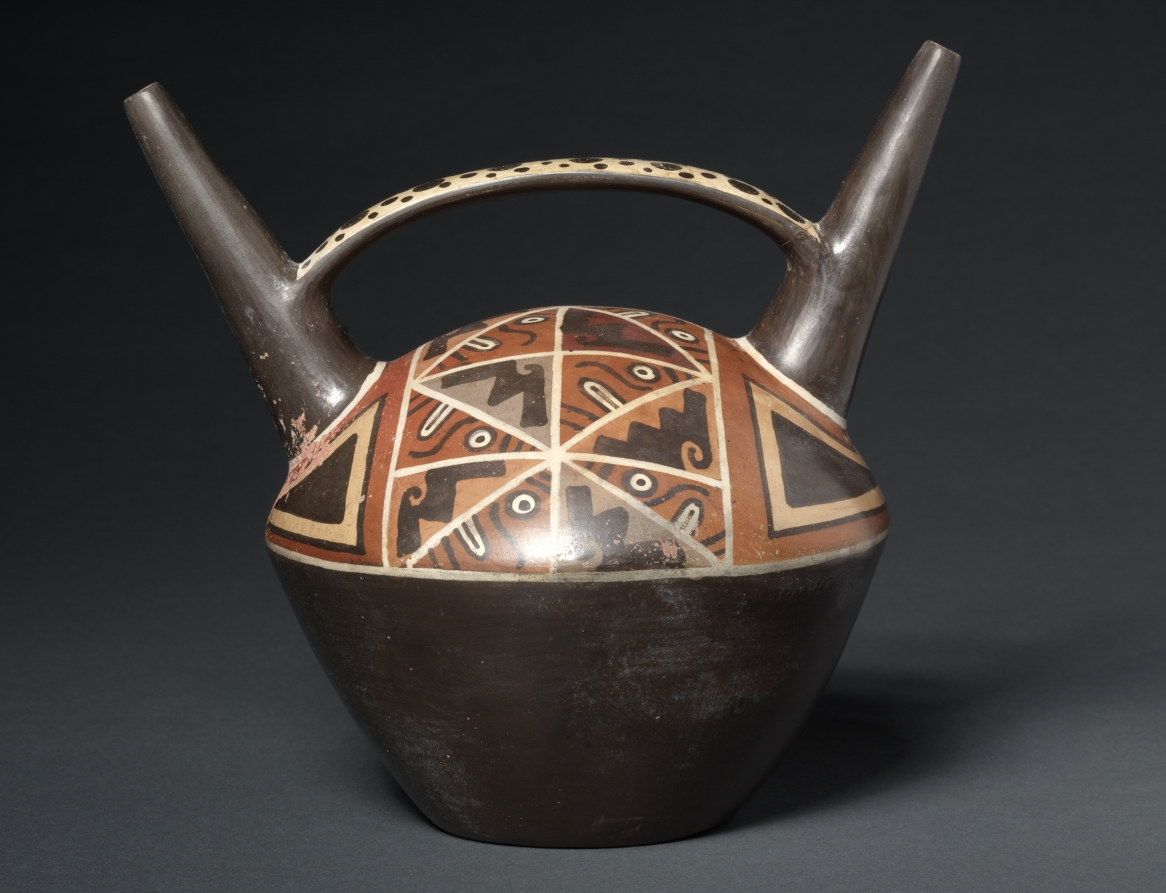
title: Double-Spouted Vessel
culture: Peru, Wari style, 6th-10th century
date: 500–900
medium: ceramic, slip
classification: Ceramic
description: This vessel was created during the time of the Wari culture, a superpower of the Andes mountains whose influence was felt in adjacent coastal areas, where this ceramic was made. Across the top of the vessel's chamber is a repeated design, a profile face and stepped fret, the meaning of which remains enigmatic. It also appears on Wari tapestry tunics, high-status garments worn by officials of the Wari state. The painting on the strap handle is quite unusual; it may represent stylized feline pelage.